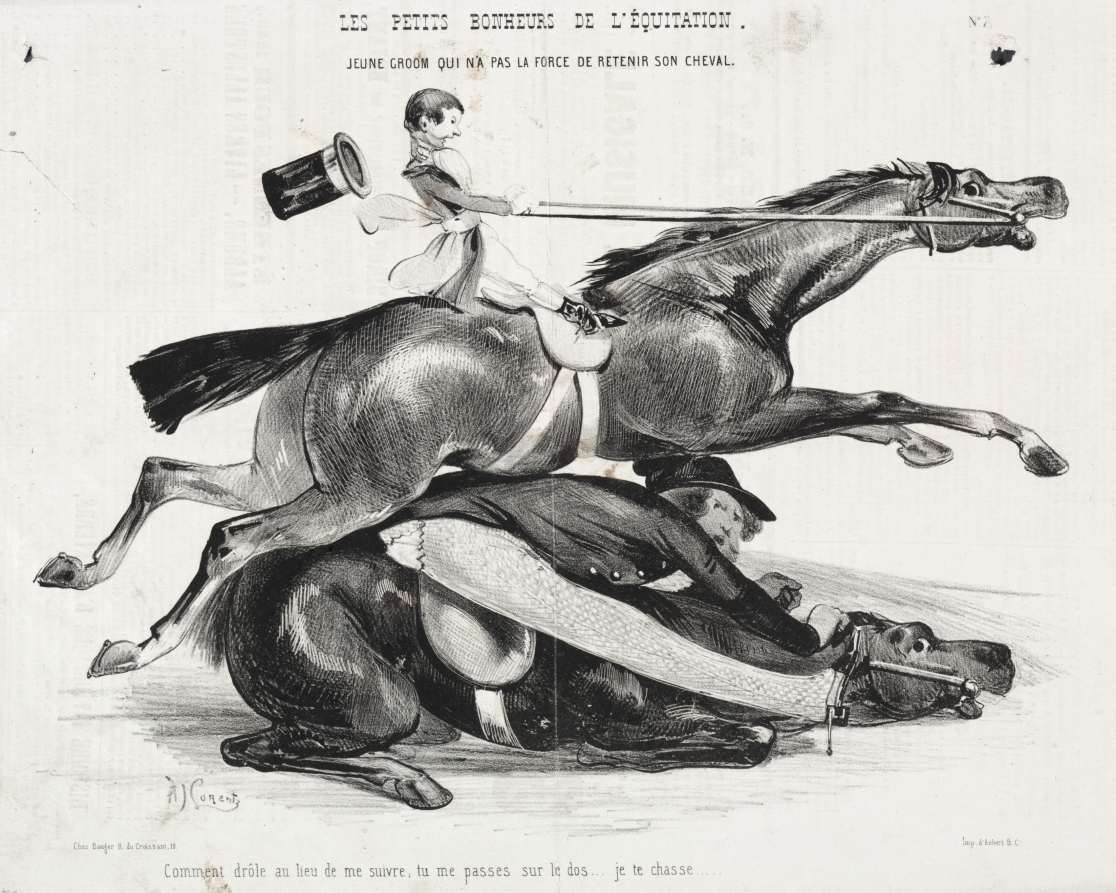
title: Les petits bonheurs de l'équitation: Jeune Groom qui n'a pas la force de retenir son cheval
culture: France, 19th century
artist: Alade Joseph Lorentz (French, 1813-after 1858)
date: 1842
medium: lithograph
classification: Print